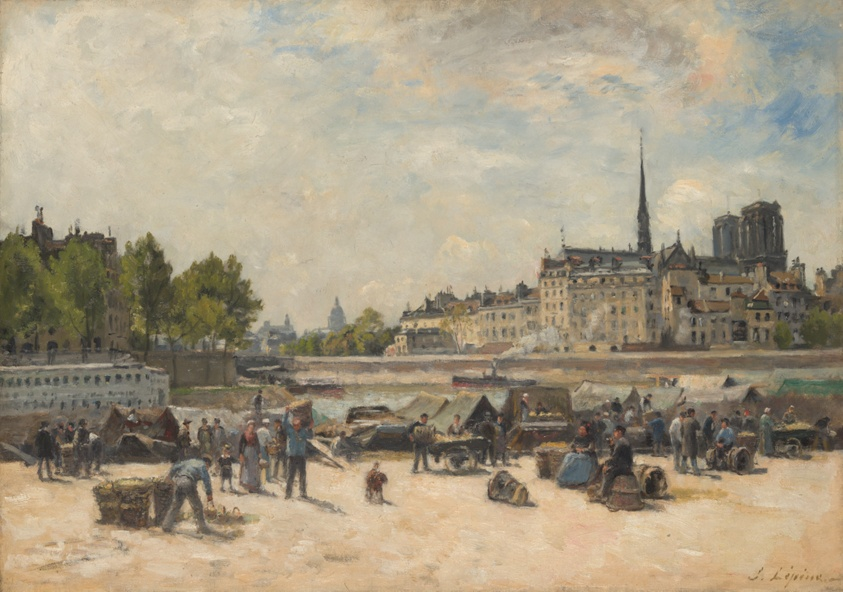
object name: Painting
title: The Apple Market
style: nineteenth century, 19th century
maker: Stanislas Lépine (French, 1835–1892)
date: c. 1880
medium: Oil on canvas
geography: France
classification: oil on canvas; paint; oil paintings (visual works); french; painting; european painting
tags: Market, animals, boats, building, buildings, church, cities, men, river, tents, trees, water, woman, women